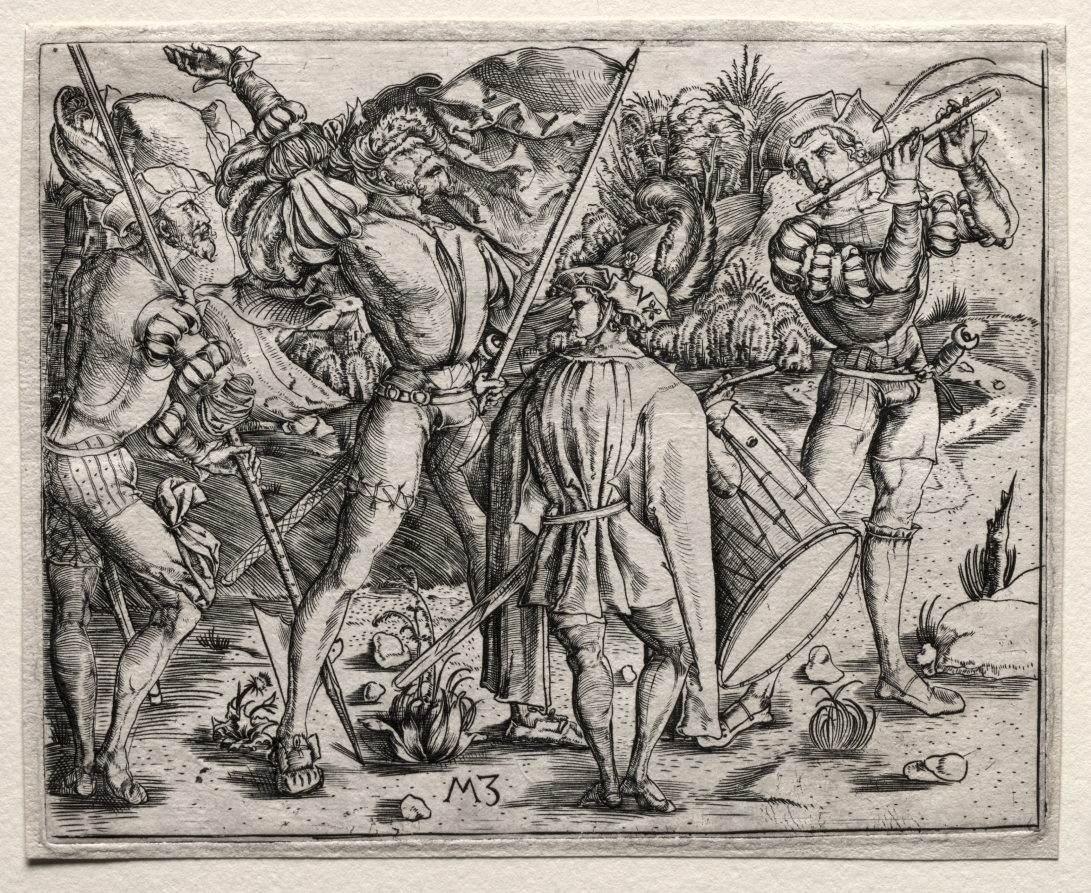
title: Four Soldiers and Military Band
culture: Germany, early 16th Century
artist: Master MZ (German)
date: 1500–03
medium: engraving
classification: Print